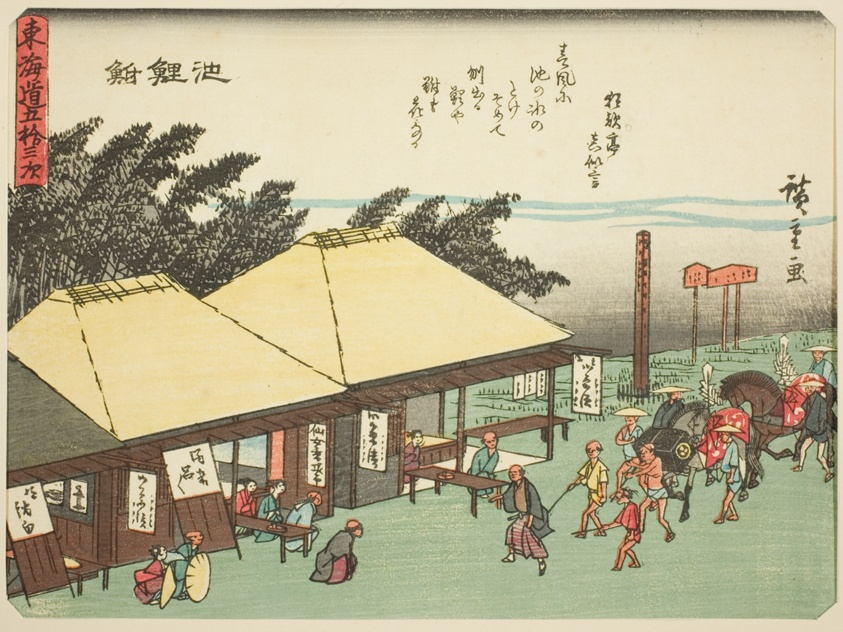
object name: Print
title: Chiryu, from the series "Fifty-three Stations of the Tokaido (Tokaido gojusan tsugi)," also known as the Tokaido with Poem (Kyoka iri Tokaido)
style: Japanese (culture or style)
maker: Utagawa Hiroshige 歌川 広重; Japanese, 1797-1858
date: c. 1837/42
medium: Color woodblock print; chuban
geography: Japan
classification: woodblock print; print; asian art